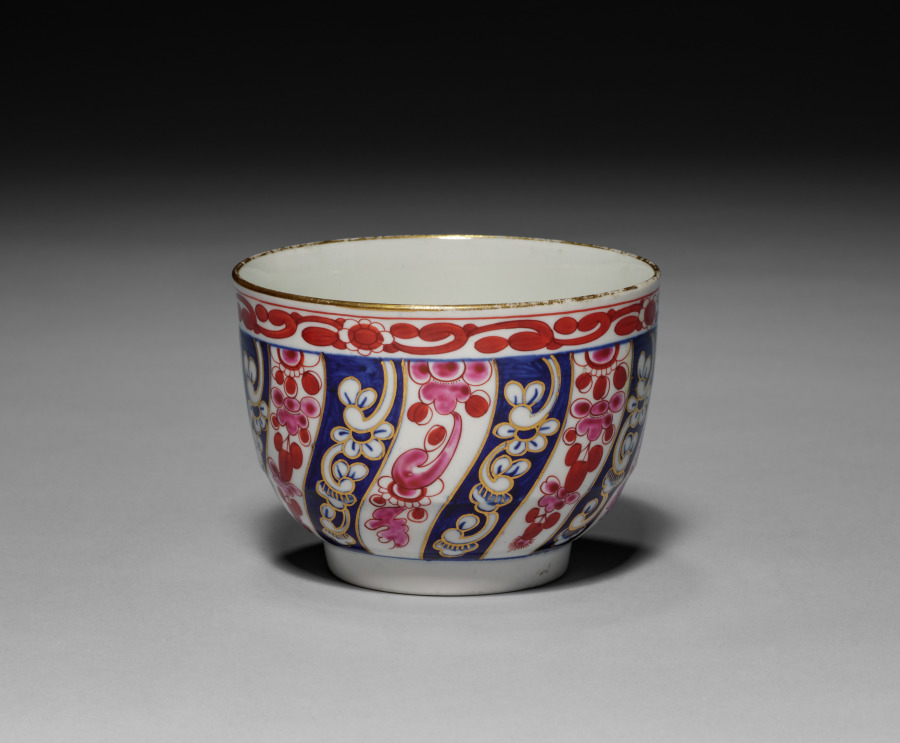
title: Bowl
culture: England, 18th century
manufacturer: Worcester Porcelain Factory (British, established 1751)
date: c. 1770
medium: porcelain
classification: Ceramic